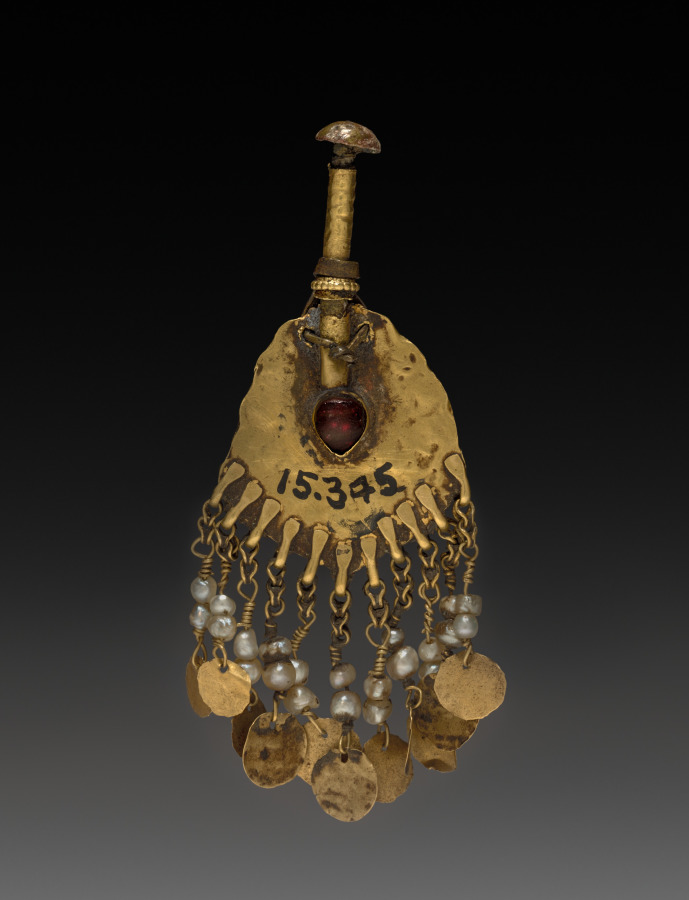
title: Ornament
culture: Nepal, Kathmandu Valley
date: 1600s-1700s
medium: gold with jewels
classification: Jewelry